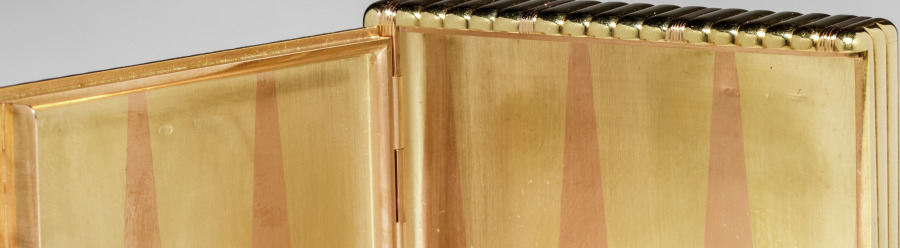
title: Cigarette Case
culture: Russia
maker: House of Fabergé (Russian, 1842–1918)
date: c. 1908–17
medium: gold, sapphire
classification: Silver